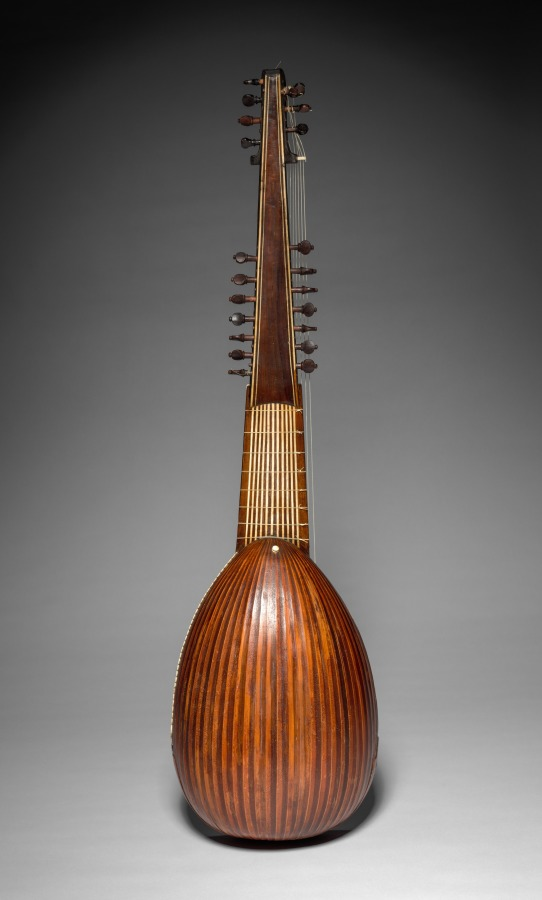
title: Lute or Tiorbino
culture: Italy, probably made in the mid-17th century, but modified by later repair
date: c. 1620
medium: wood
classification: Musical Instrument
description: The lute was the most important musical instrument in secular settings throughout the 16th and 17th centuries. Not only a virtuoso instrument with a huge repertoire, the lute provided the ideal accompaniment for the voice, played an essential role in ensembles, figured in masques and operas, and was played by amateurs as well as professionals. A highly specialized instrument, this tiorbino is a type of long-necked lute resembling a theorbo, but significantly smaller and pitched an octave higher. An object of great rarity, it is one of the smallest Baroque tiorbinos to survive.